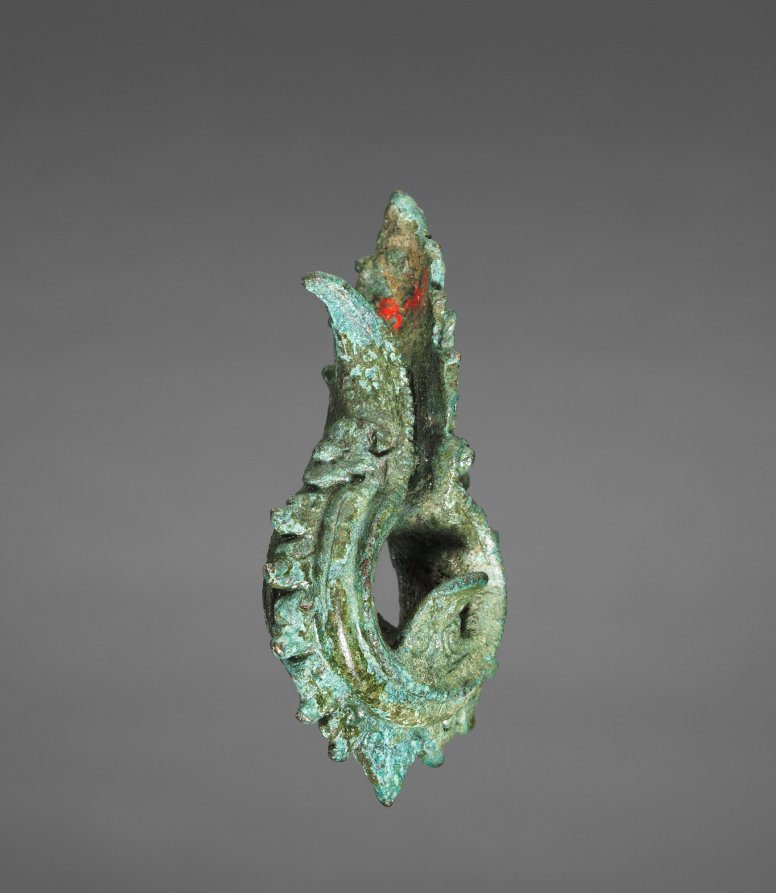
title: Earring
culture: Cambodia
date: 1200s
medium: bronze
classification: Jewelry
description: This earring is in the form of naga, or water serpent, one of the most popular decorative motifs in Cambodian art. While bronze objects such as furniture and palanquin fittings and finials, hooks, rings, etc., were among the most typical items of the classical Angkorean art (12th–13th century), jewelry is very rare. Originally, it must have been gilt. It is conceivable that this earring may not have been used as a regular ear ornament but enhanced a Khmer sculpture, a common practice, which would explain their heavy weight and large size.